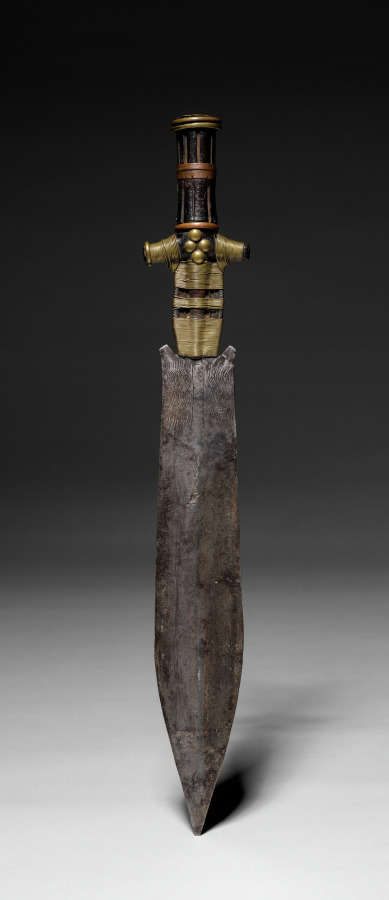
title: Knife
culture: Africa, Central Africa, Democratic Republic of Congo, unknown maker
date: 1800s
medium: Iron, wood, copper alloy, leather or rawhide, and upholstery studs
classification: Arms and Armor